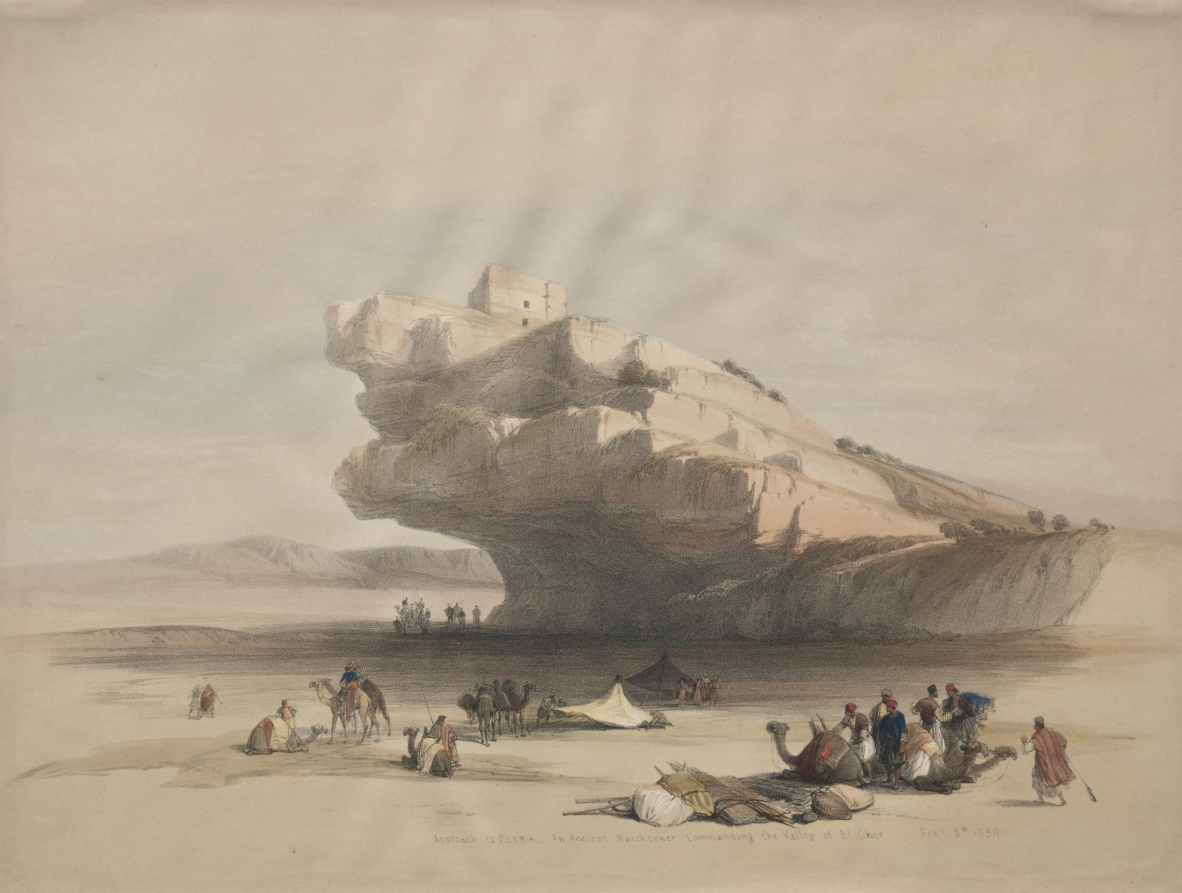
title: Approach to Petra, an Ancient Watch Tower Commanding the Valley of El Chor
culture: England, 19th century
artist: David Roberts (Scottish, 1796–1864)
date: 1839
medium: color lithograph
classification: Print